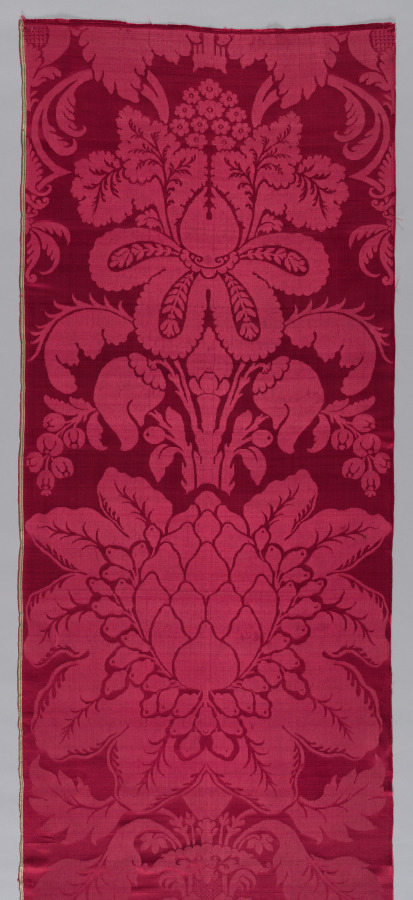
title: Two Large Damask Cloths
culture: Italy, 17th century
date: 1600s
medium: damask, silk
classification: Textile